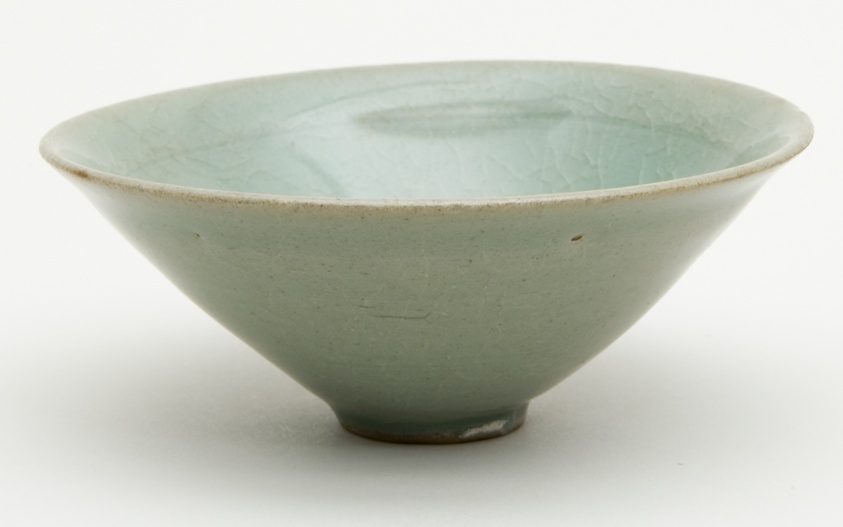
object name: Vessel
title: Conical Bowl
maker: China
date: Southern Song dynasty (1127–1279)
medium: Longquan ware, glazed stoneware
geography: China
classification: vessel